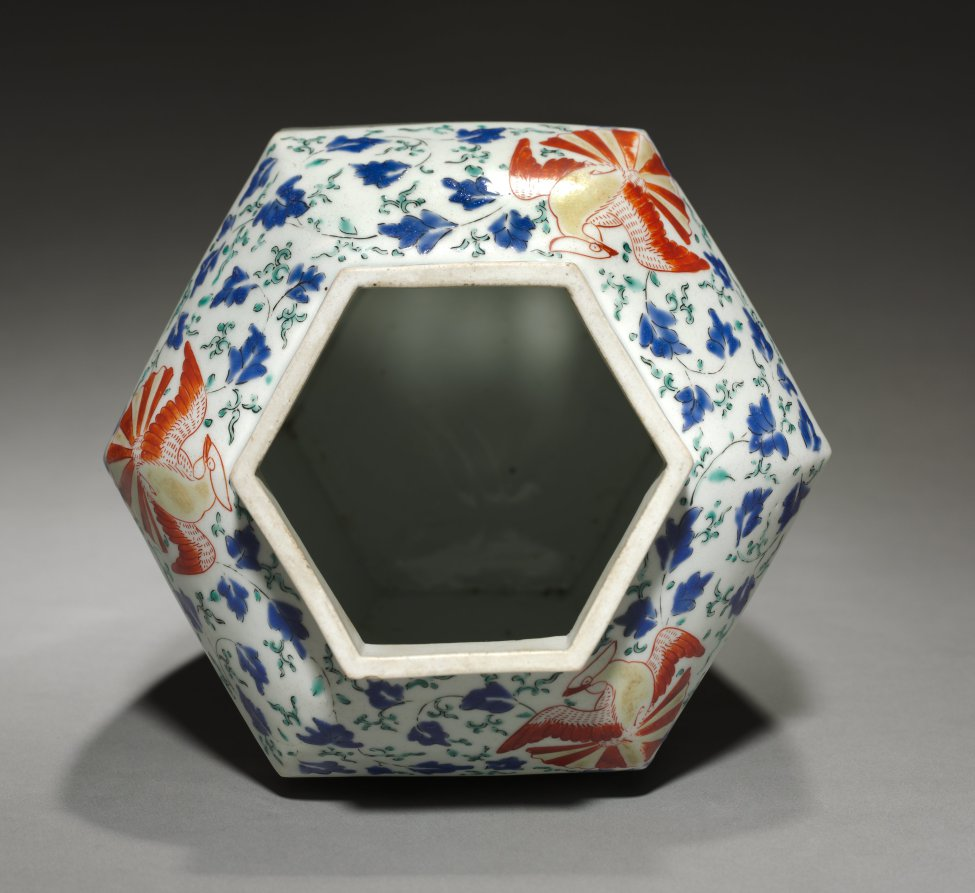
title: Hexagonal Jar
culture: Japan, Edo period (1615–1868)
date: late 1600s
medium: One of a pair; porcelain with overglaze color enamel and gold decoration (Hizen ware, Kakiemon type)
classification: Ceramic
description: This kakiemon-type jar with plum design is a product made for the European markets. Here, Japanese kakiemon potters transformed the typical plum, bamboo, and pine motifs into a theme appreciating the plum. The 9th-century Japanese scholar and politician Sugawara Michizane established the plum as a symbol of scholarship. An excellent poet, particularly of Chinese-style poetry, he was also well known for his love of plum blossoms. Later, the plum came to represent tenmangu, a shrine for Sugawara.